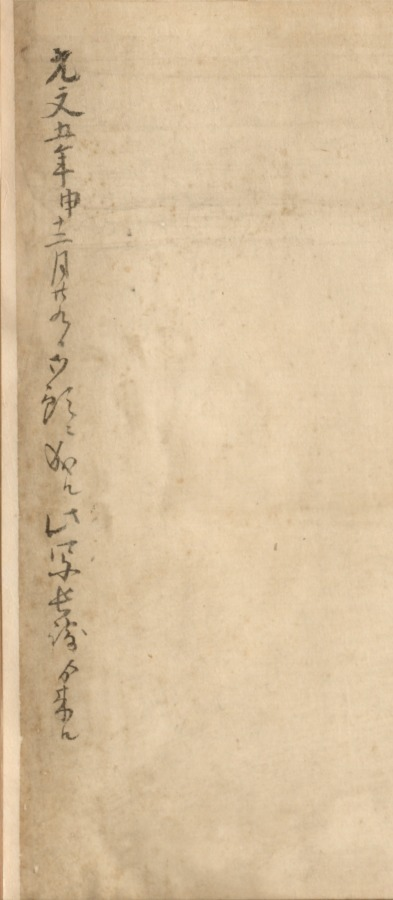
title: Tortoise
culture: Japan, Edo period (1615–1868)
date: 1700s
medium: watercolor on paper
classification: Painting